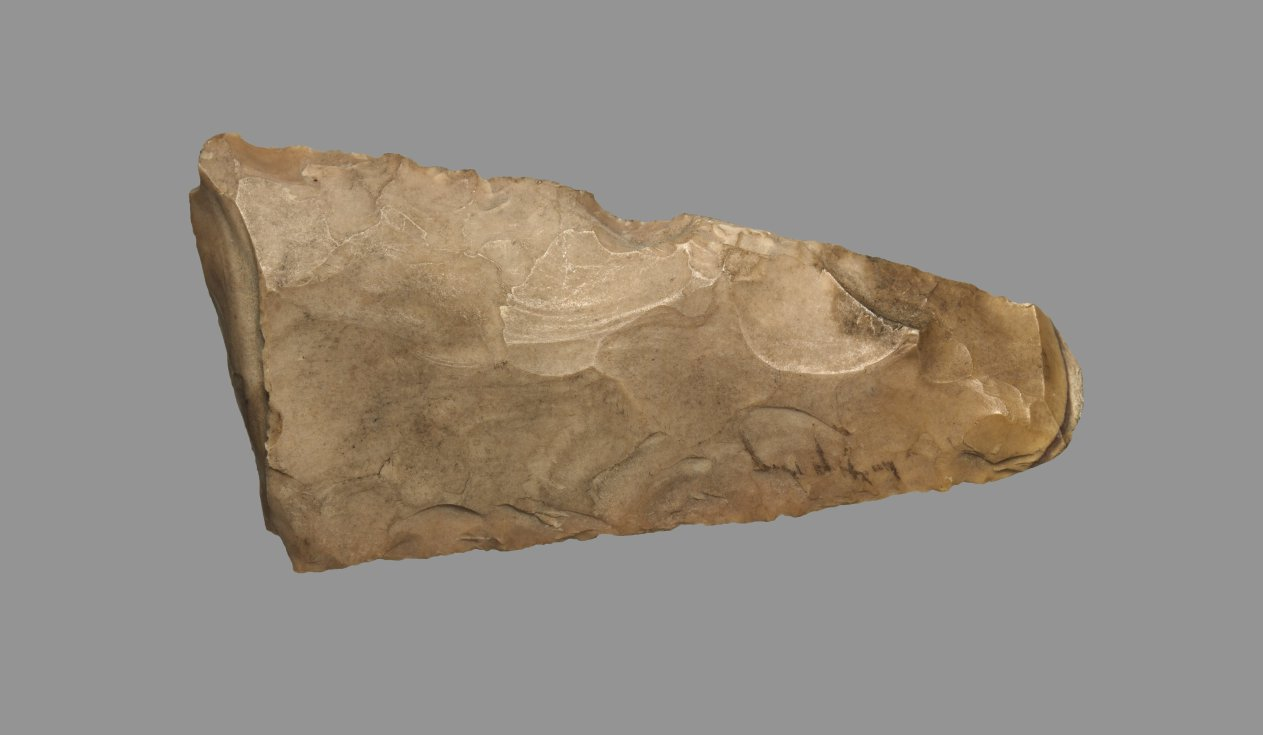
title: Hand Axe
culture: Egypt, Haraga, excavated in 1914, Predynastic (5000–2950 BCE)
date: 5000–3000 BCE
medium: tan-colored flint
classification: Implements